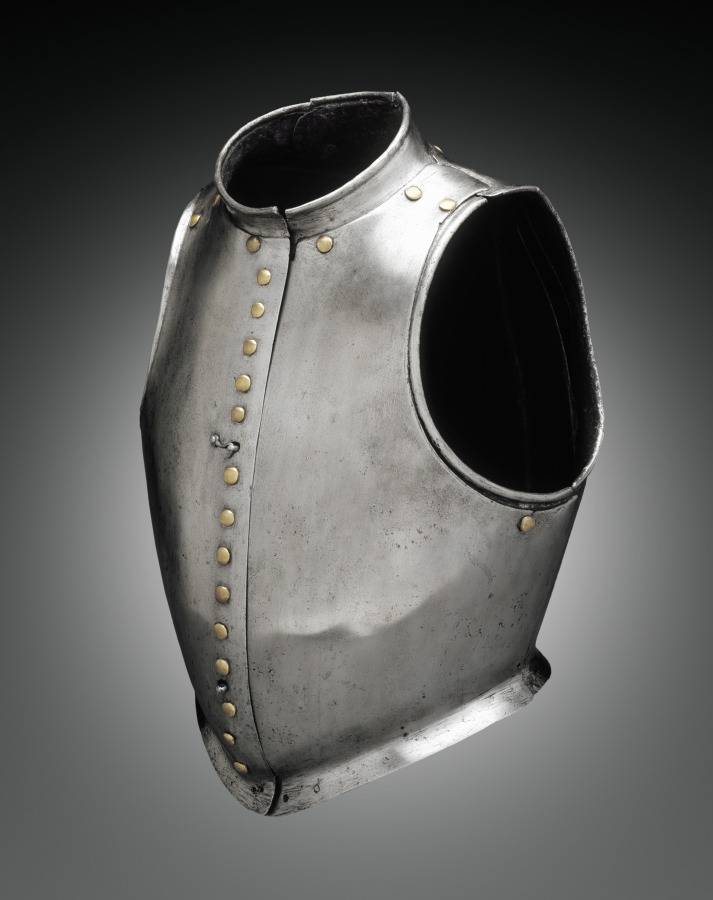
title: "Waistcoat" Cuirass (Combined Breast and Backplates)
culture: North Italy, 16th century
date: c. 1580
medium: Steel; brass rivets simulating buttons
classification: Arms and Armor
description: This cuirass is a specialized type of costume armor. In addition to protecting its owner's torso, it was clearly intended to simulate a civilian jacket, or doublet, with a row of buttons down the front. The owner would have opened it like an ordinary doublet since the two halves are hinged to a narrow backplate.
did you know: While it would provide some protection to the torso, the armor here is very light; fashion not function was the prerequisite.